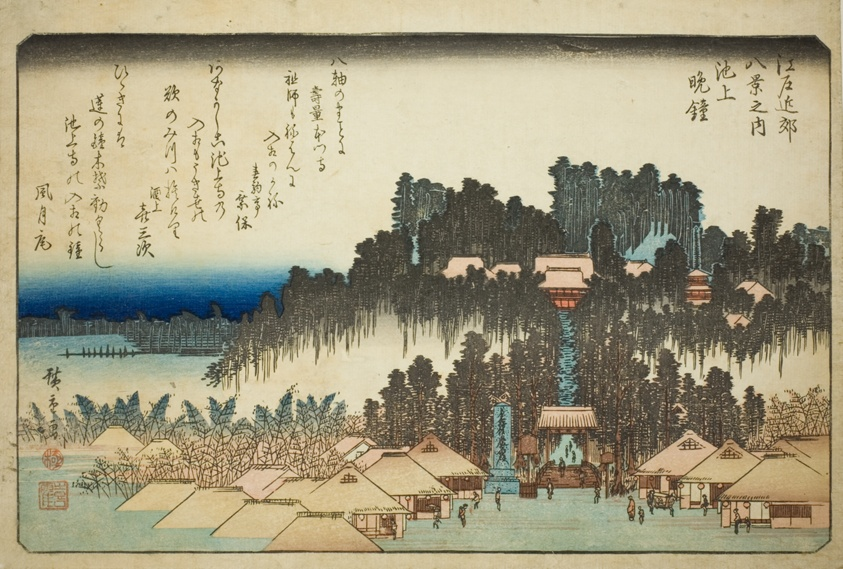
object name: Print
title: Evening Bell at Ikegami (Ikegami no bansho), from the series "Eight Views in the Environs of Edo (Edo kinko hakkei no uchi)"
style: Japanese (culture or style)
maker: Utagawa Hiroshige 歌川 広重; Japanese, 1797-1858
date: c. 1837/38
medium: Color woodblock print; oban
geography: Japan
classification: woodblock print; print; asian art